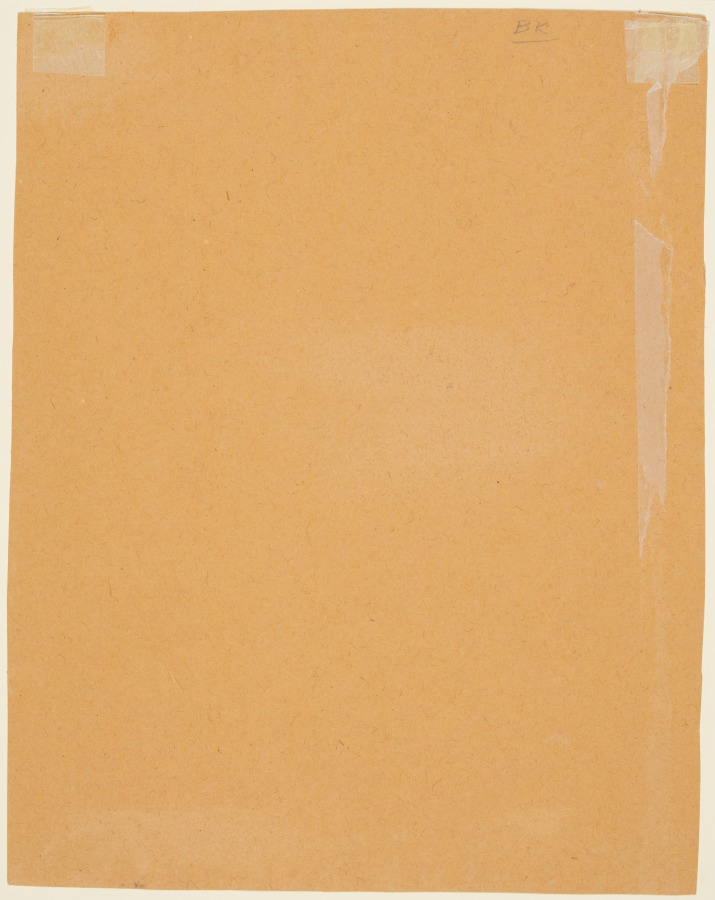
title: Woman Addressing a Peacock: Gujari Ragini of Megh, from a Ragamala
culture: Northwestern India, Rajasthan, Rajput Kingdom of Bundi or Raghogarh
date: c. 1680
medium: gum tempera and gold on paper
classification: Painting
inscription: gujarī rāganī. 14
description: Gujari Ragini, a musical mode, is personified as the one who sings songs praising her beloved on experiencing pangs of separation. She sits on a throne outside a well-appointed chamber and holds her stringed instrument, the vina, in her right hand. Her songs have attracted a male peacock who dances to the tunes she sings. A pair of yellow birds take flight in the background.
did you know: The heroine presents her pearl necklace to the peacock.